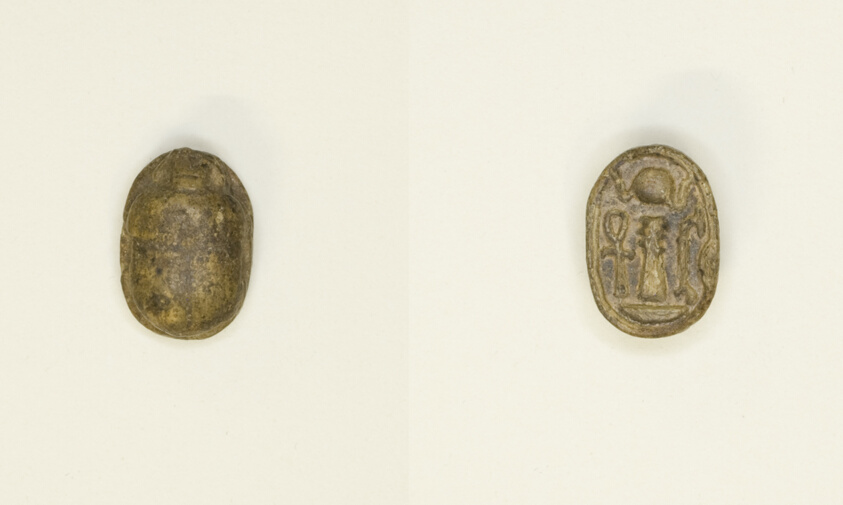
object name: Costume and Accessories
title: Scarab: Hieroglyphs (wAs-sign, Dd-sign, anx-sign)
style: new kingdom, ancient, egyptian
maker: Egyptian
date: New Kingdom, Dynasties 18–20 (about 1550–1069 BCE)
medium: Steatite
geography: Egypt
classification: scarab; ancient art; costume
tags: Hieroglyphs, sun